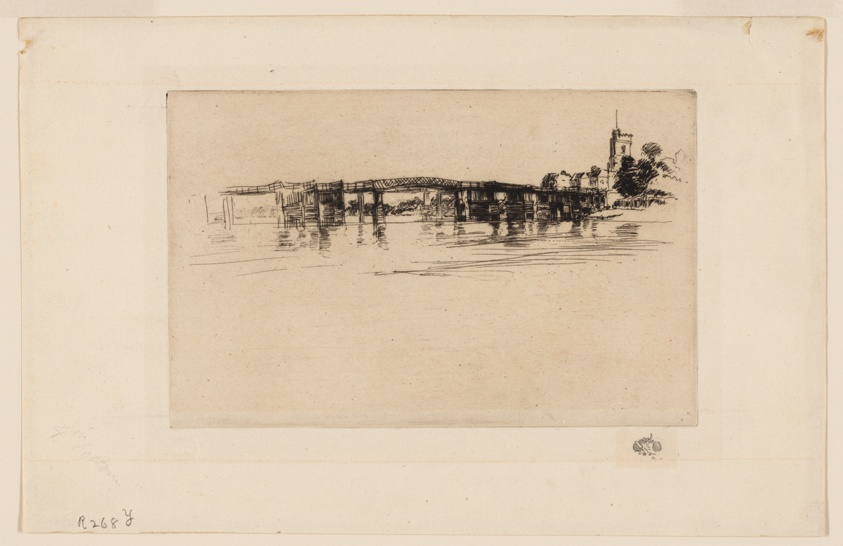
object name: Print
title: Little Putney Bridge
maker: James McNeill Whistler (American, 1834-1903)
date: 1879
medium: Etching and drypoint in black ink on ivory laid paper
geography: United States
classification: etching; print; prints and drawing; paper; drypoint